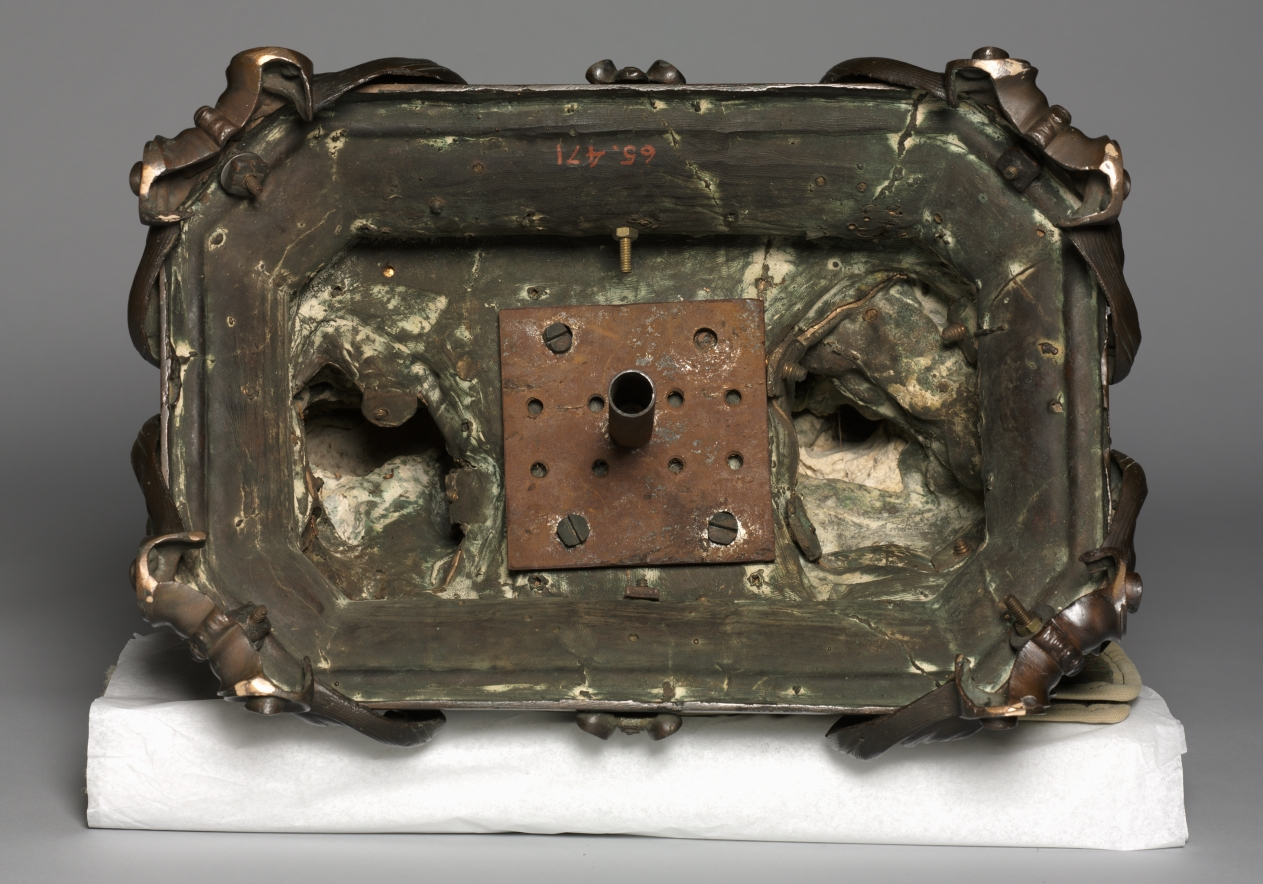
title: Baptism of Christ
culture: Italy, 17th century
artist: Alessandro Algardi (Italian, 1598–1654)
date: designed 1645–46, probably made 1650–55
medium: bronze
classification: Sculpture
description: When Innocent X (Giovanni Battista Pamphili, ruled 1644–55) became pope, Alessandro Algardi endeavored to obtain his patronage. This bronze Baptism of Christ is a casting from the molds used for an original silver sculpture that Algardi presented to the new pope to gain his support in 1646. The composition depicts an important scene in the life of Christ. On the right is John the Baptist, who pours water onto Jesus's head from a shell. As Christ bows his head to be baptized, a little angel holds the edge of his cloak. Algardi worked carefully to make this piece exciting from a number of points of view. Its dramatic emphasis shifts, depending on the viewer's vantage point.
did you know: Algardi's sculpture plays on its intended recipient's given name: Giovanni Battista (John the Baptist).